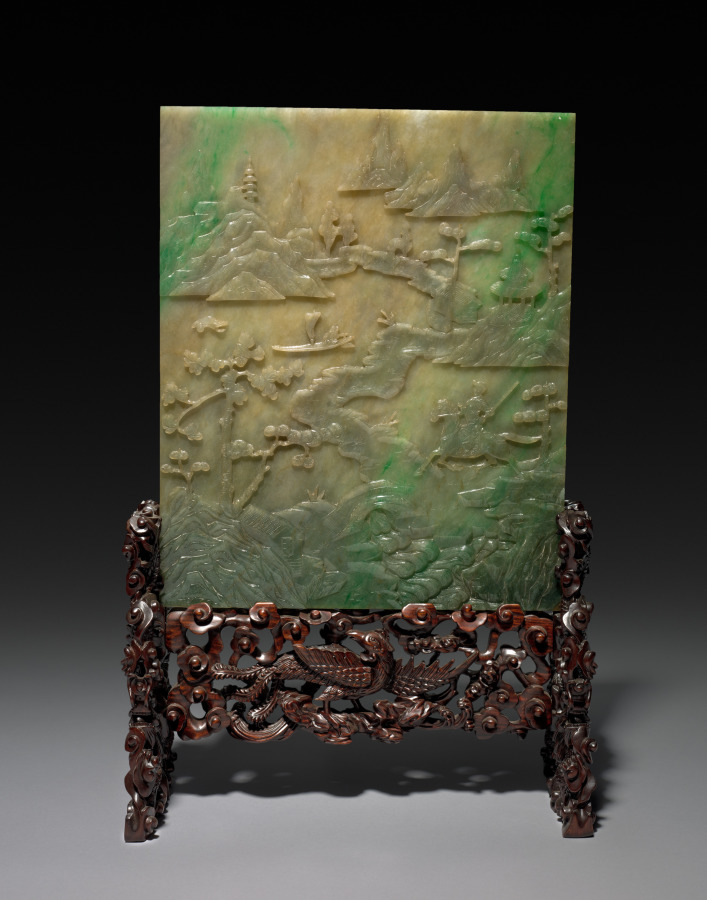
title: Table Screen with Stand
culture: China, Qing dynasty (1644-1911)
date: 1644–1911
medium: jade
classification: Jade